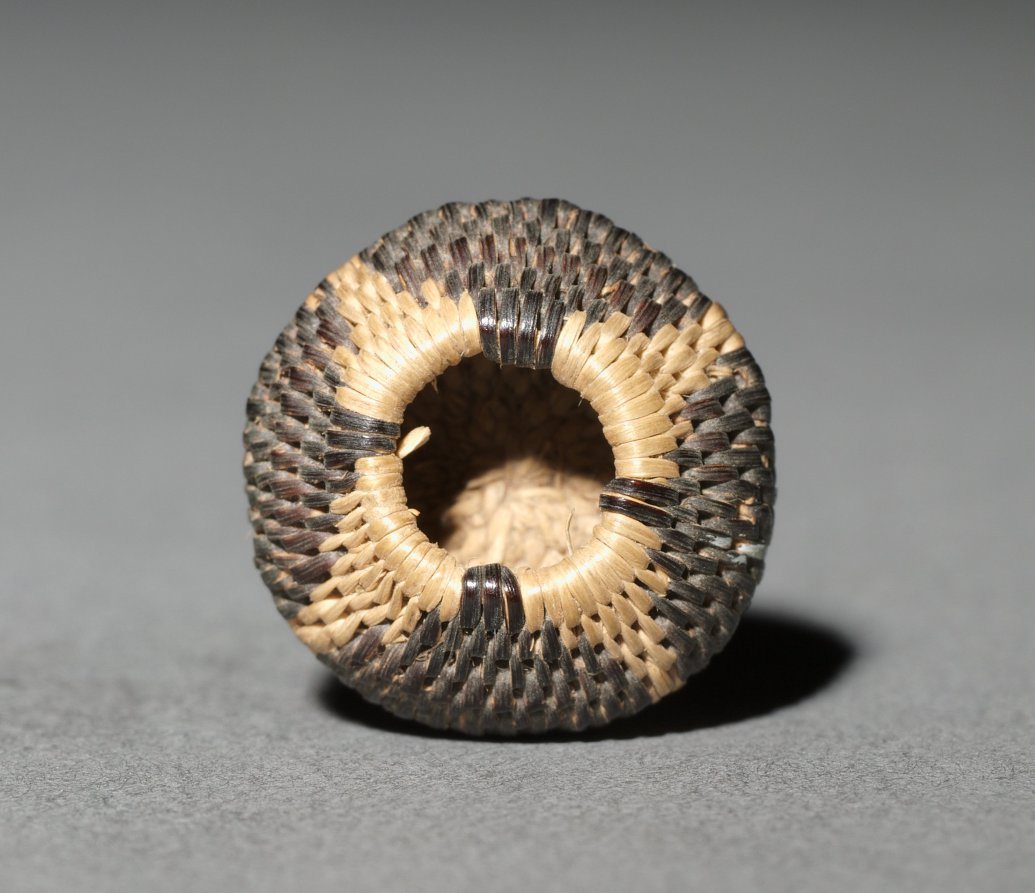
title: Miniature Basket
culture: America, Native North American, Southwest, Arizona, Akimel O'odham (Pima), Unassigned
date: before 1923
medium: plant fiber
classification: Basketry